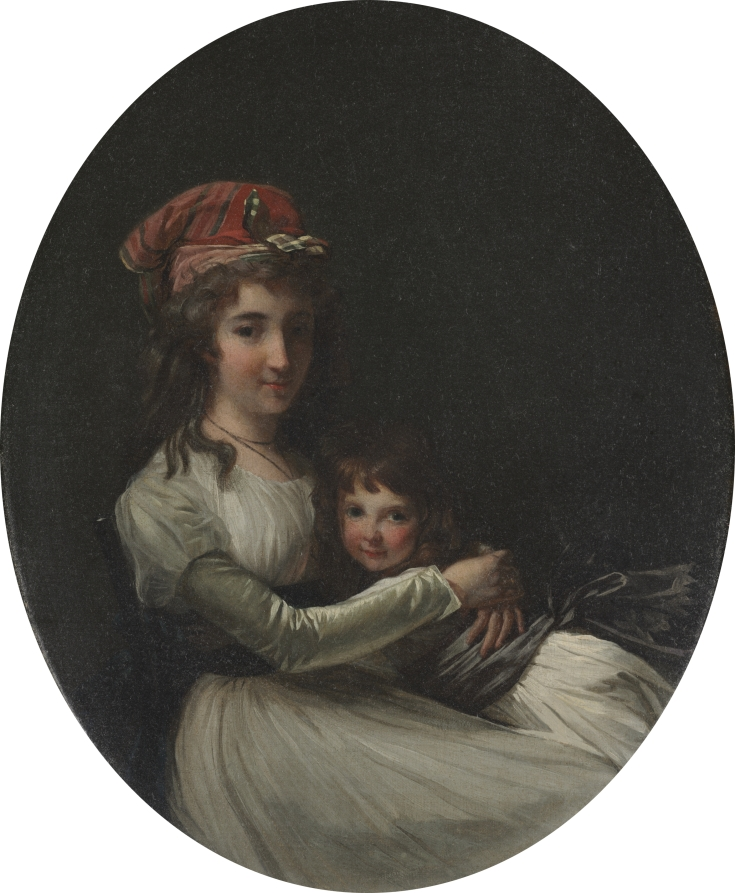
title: Portrait of a Mother and Daughter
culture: France, 18th century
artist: attributed to Henri-Pierre Danloux (French, 1753–1809)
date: c. 1794–95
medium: oil on canvas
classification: Painting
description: Though flowing loose and free across her shoulders, the woman’s hair is partly bound up in a red kerchief, a tell-tale sign she is an active participant in the French Revolution. The painting also celebrates primary values of the Revolutionary period--close family bonds and, especially, the mother’s role in raising children--by depicting an intimate connection between mother and daughter.